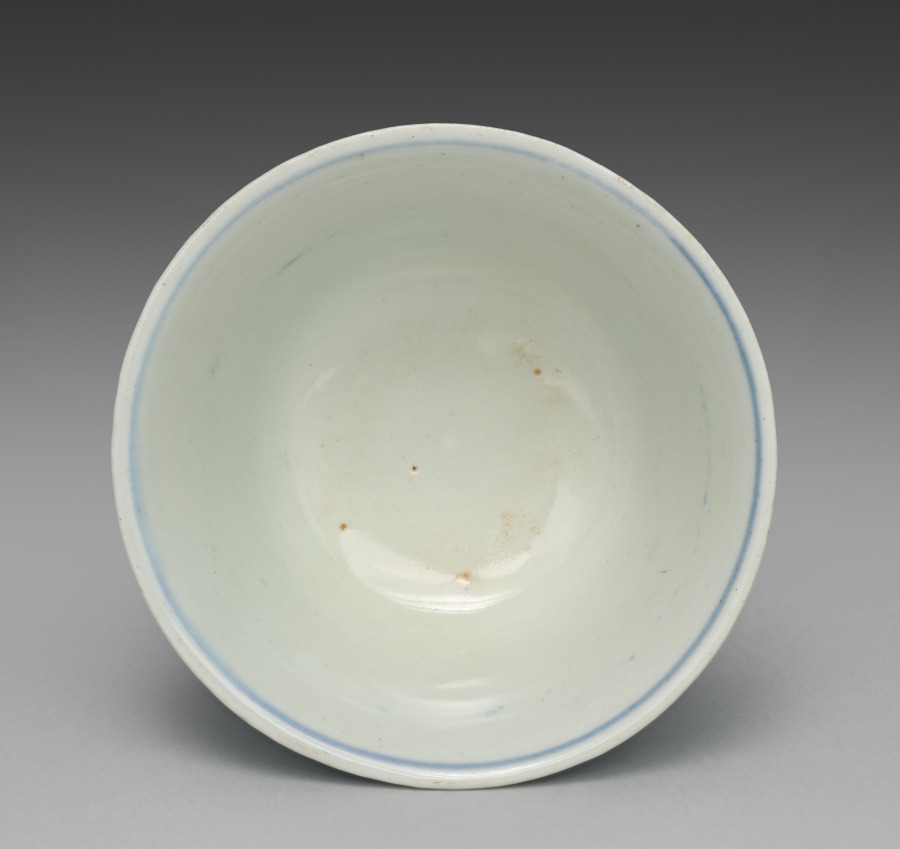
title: Cup from Tea Cups with Dragons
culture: Japan, Edo period (1615–1868)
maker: Seifū Yohei I (Japanese, 1801–1861)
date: 1840s–57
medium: One from a set of five tea cups; porcelain with underglaze blue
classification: Ceramic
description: Seifū Yohei I made both blue and white porcelains after Ming dynasty (1368–1644) Chinese wares fired in the kilns at Jingdezhen for export. He also made colorful stoneware in the style of his teacher, Nin’ami Dōhachi (Takahashi Dōhachi II) (1783–1855).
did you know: A small figure of an elephant serves as the handle for the lid.